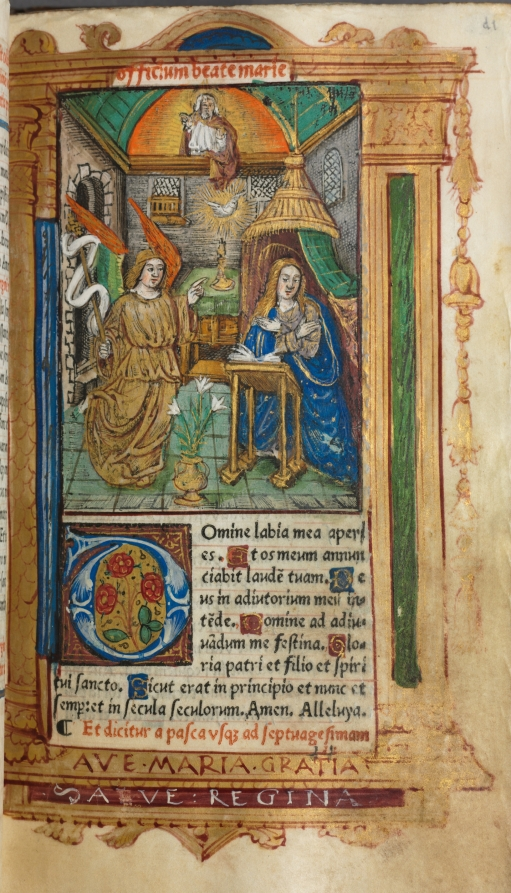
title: Printed Book of Hours (Use of Rome): fol. 25r, The Annunciation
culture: France, Paris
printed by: Guillaume Le Rouge (French, Paris, active 1493–1517)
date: 1510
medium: 112 Printed folios on parchment, bound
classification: Bound Volume